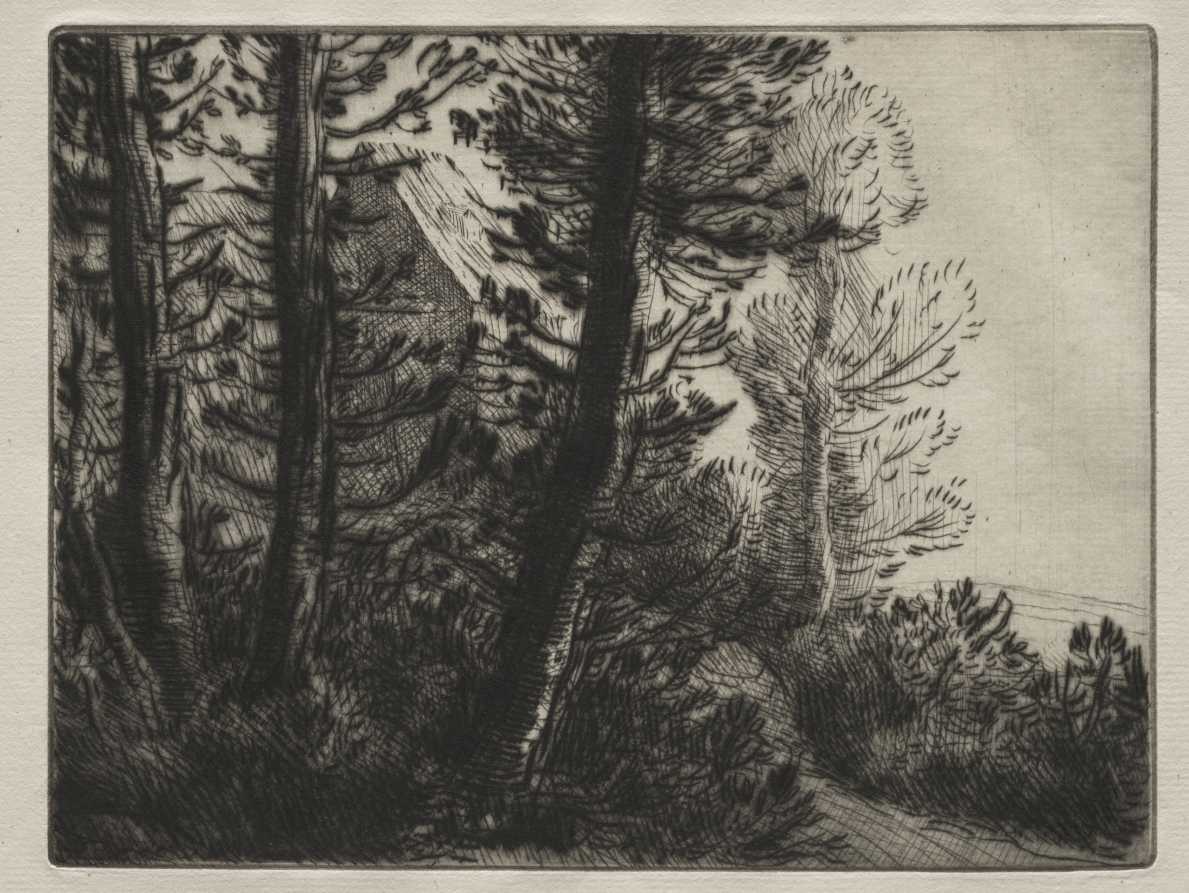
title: Guard House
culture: France, 19th-20th century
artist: Alphonse Legros (French, 1837–1911)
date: c. 1857–1911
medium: etching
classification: Print